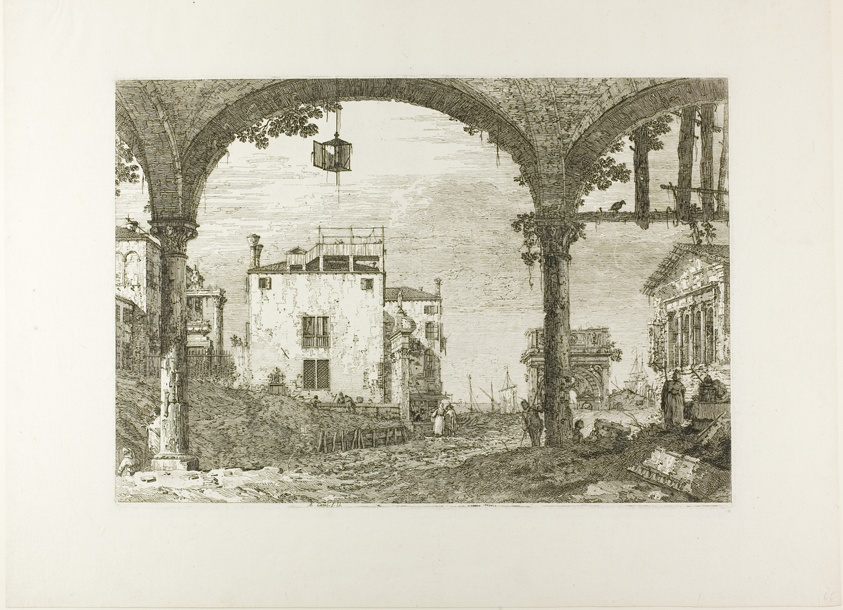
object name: Print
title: The Portico with the Lantern, from Vedute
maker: Canaletto (Italian, 1697-1768)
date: 1735/44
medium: Etching in black on ivory laid paper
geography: Italy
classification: etching; print; prints and drawing